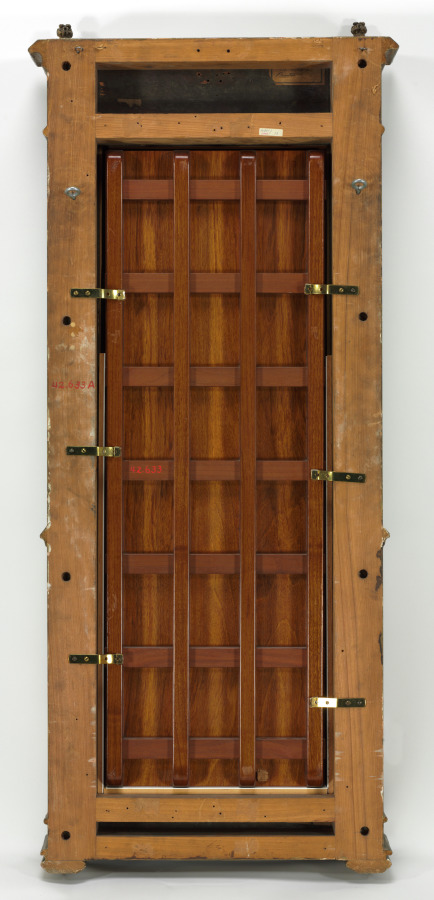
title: Saint Catherine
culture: Flanders, Bruges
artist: Master of the Holy Blood (Netherlandish)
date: c. 1520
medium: tempera on wood panel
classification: Painting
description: Saint Catherine holds the sword with which she was martyred. This painting and another in the collection (1942.633.2) were originally the wings of an altarpiece flanking a central panel, now lost, that may have depicted the Holy Family. The identity of this artist is unknown, but he is named for a painting in the Chapel of the Holy Blood in Bruges. Bruges flourished as an international commercial center through the 1400s and early 1500s. Among its residents were many foreign merchants and bankers who, along with the Burgundian court, patronized artists and attracted specialized craftsmen such as furriers, hatters, jewelers, and goldsmiths. Bruges’s artistic production in the 1400s included celebrated artists like Jan van Eyck, Petrus Christus, Hans Memling, and Gerard David who painted large altarpieces, small panels for private devotion, and portraits. Bruges also remained an important center for the production of illuminated manuscripts.